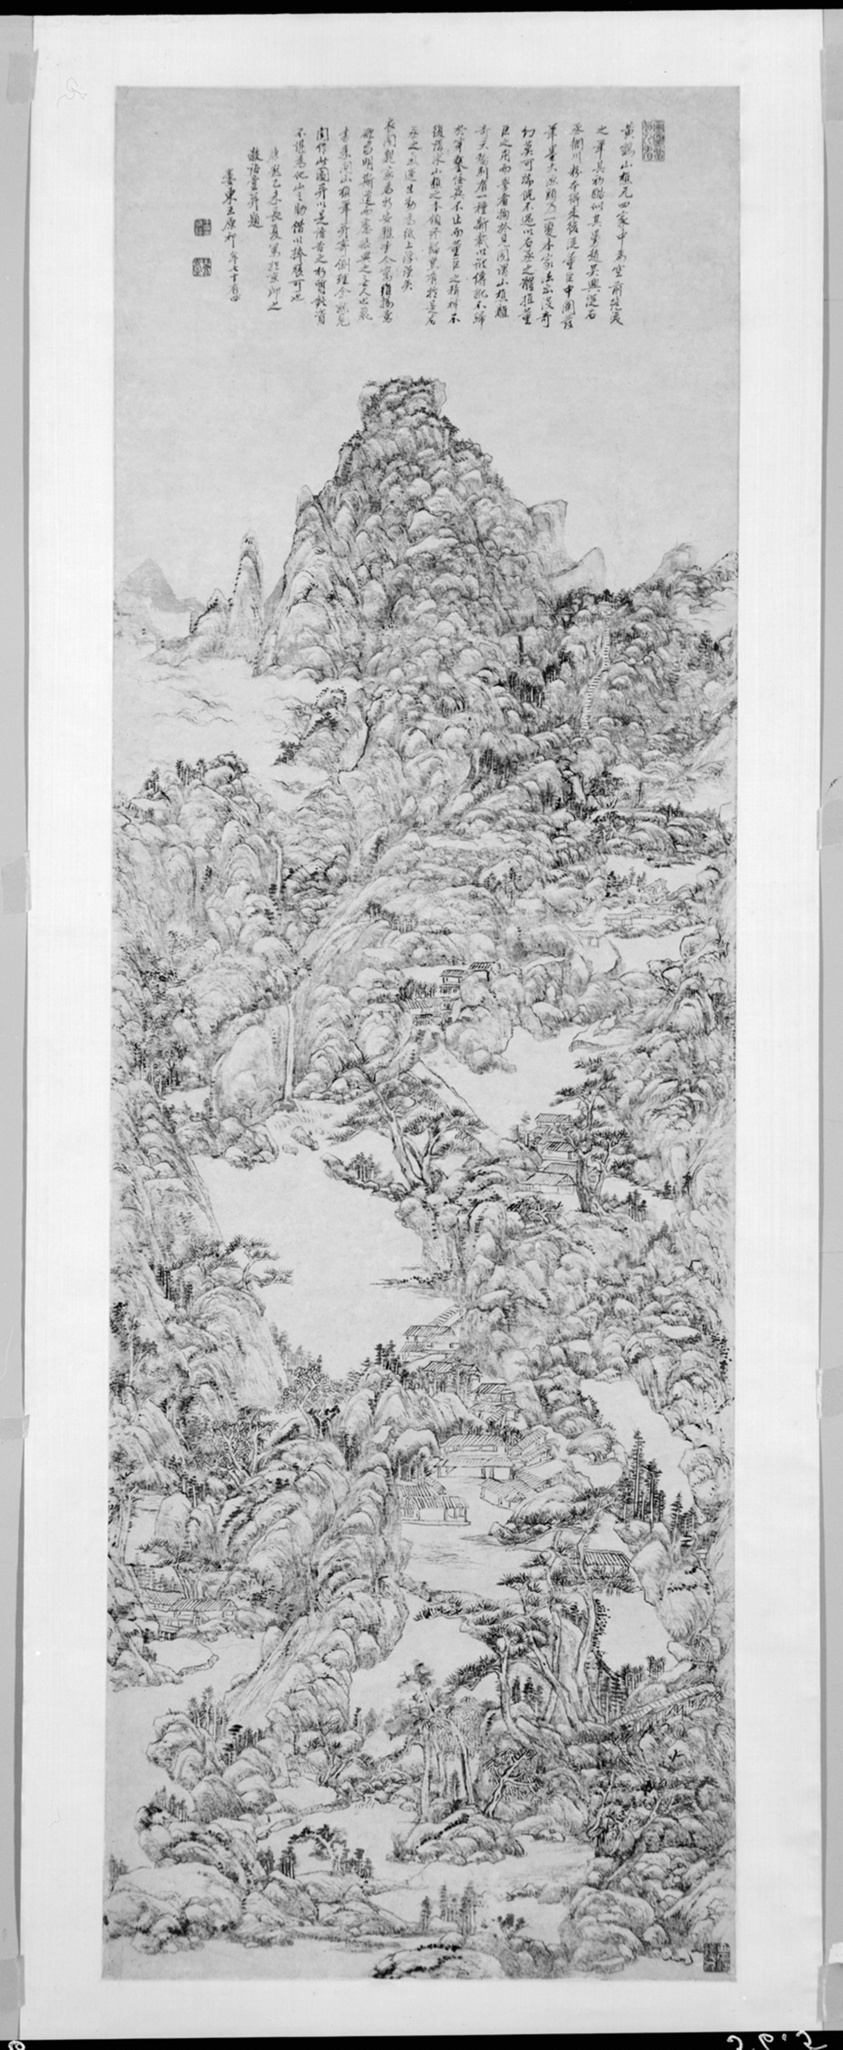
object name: Painting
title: Mountainous Landscape after Wang Meng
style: Chinese (culture or style)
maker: Attributed to Wang Yuanqi; Chinese, 1642-1715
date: Qing dynasty (1644–1911), 1715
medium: Hanging scroll; ink on paper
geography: China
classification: hanging scroll; painting; asian art